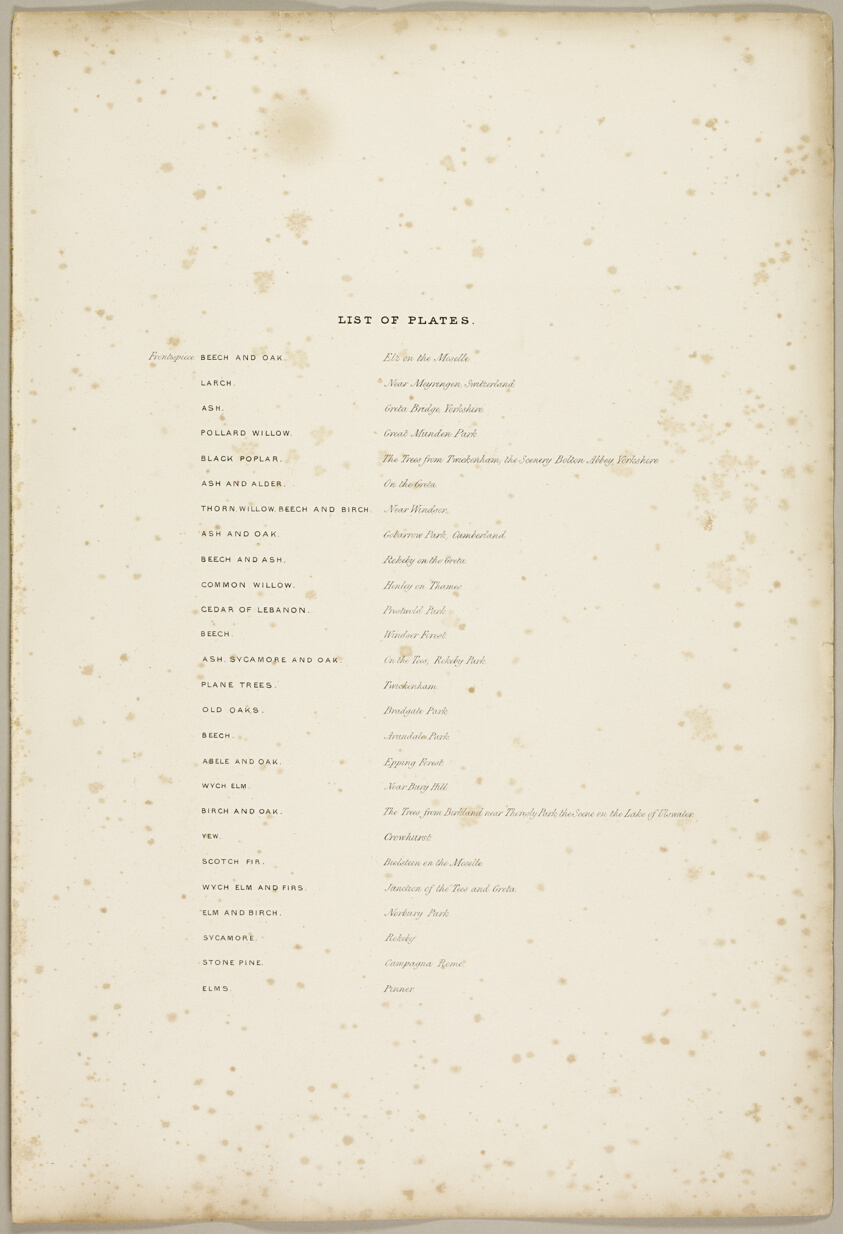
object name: Print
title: List of Plates, from The Park and the Forest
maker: James Duffield Harding (English, 1798-1863); printed by Charles Joseph Hullmandel (English, 1789–1850); published by Thomas McLean (English, 1788–1875)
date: 1841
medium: Lithograph in black on ivory wove paper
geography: England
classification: lithograph; print; prints and drawing